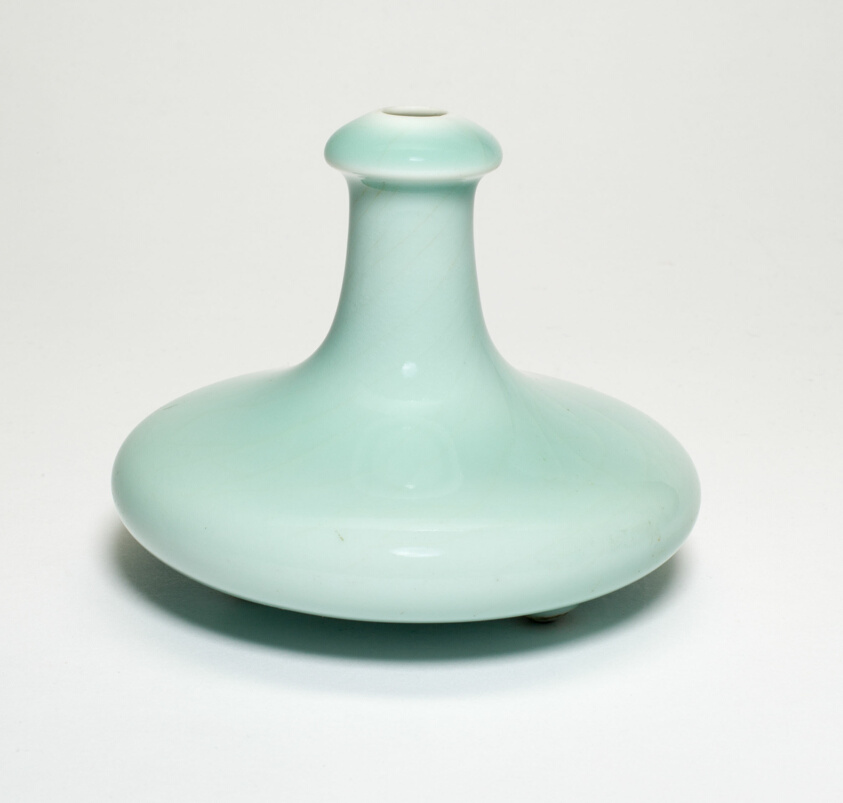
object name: Vessel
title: Vase with Flattened Body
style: Chinese (culture or style)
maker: China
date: Qing dynasty (1644–1911), Yongzheng reign mark (1723–1735), 18th/19th century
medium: Celadon-glazed porcelain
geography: China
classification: vase; porcelain; vessel; ceramics; asian art